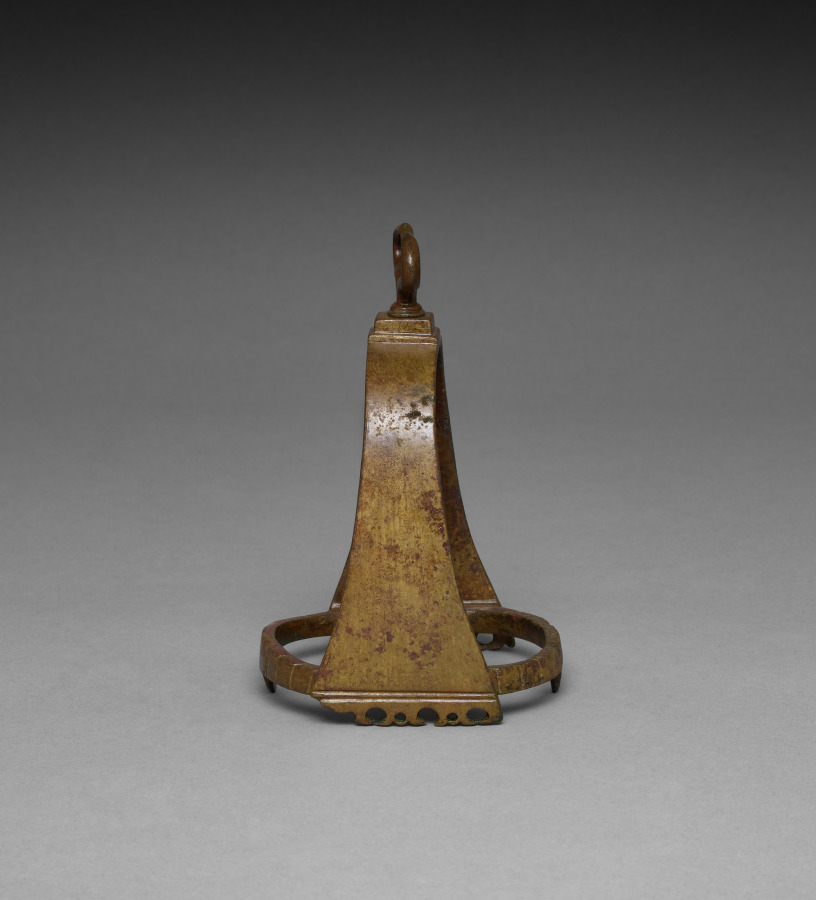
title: Stirrup (2 of 2)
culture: England (?), 17th century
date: 1600s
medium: brass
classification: Arms and Armor